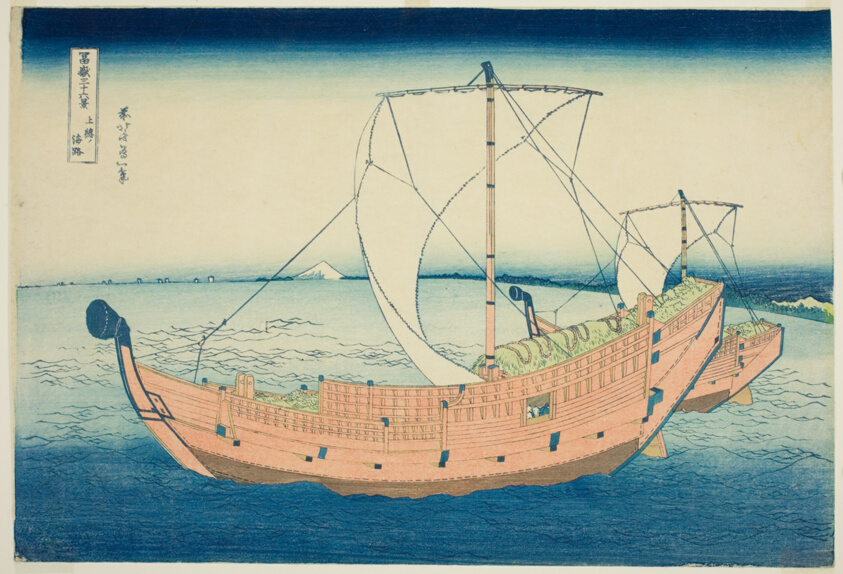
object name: Print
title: Sea Lane off Kazusa Province (Kazusa no kairo), from the series "Thirty-Six Views of Mount Fuji (Fugaku sanjurokkei)"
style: Japanese (culture or style)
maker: Katsushika Hokusai 葛飾 北斎; Japanese, 1760-1849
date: c. 1830/33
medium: Color woodblock print; oban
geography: Japan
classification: woodblock print; print; asian art